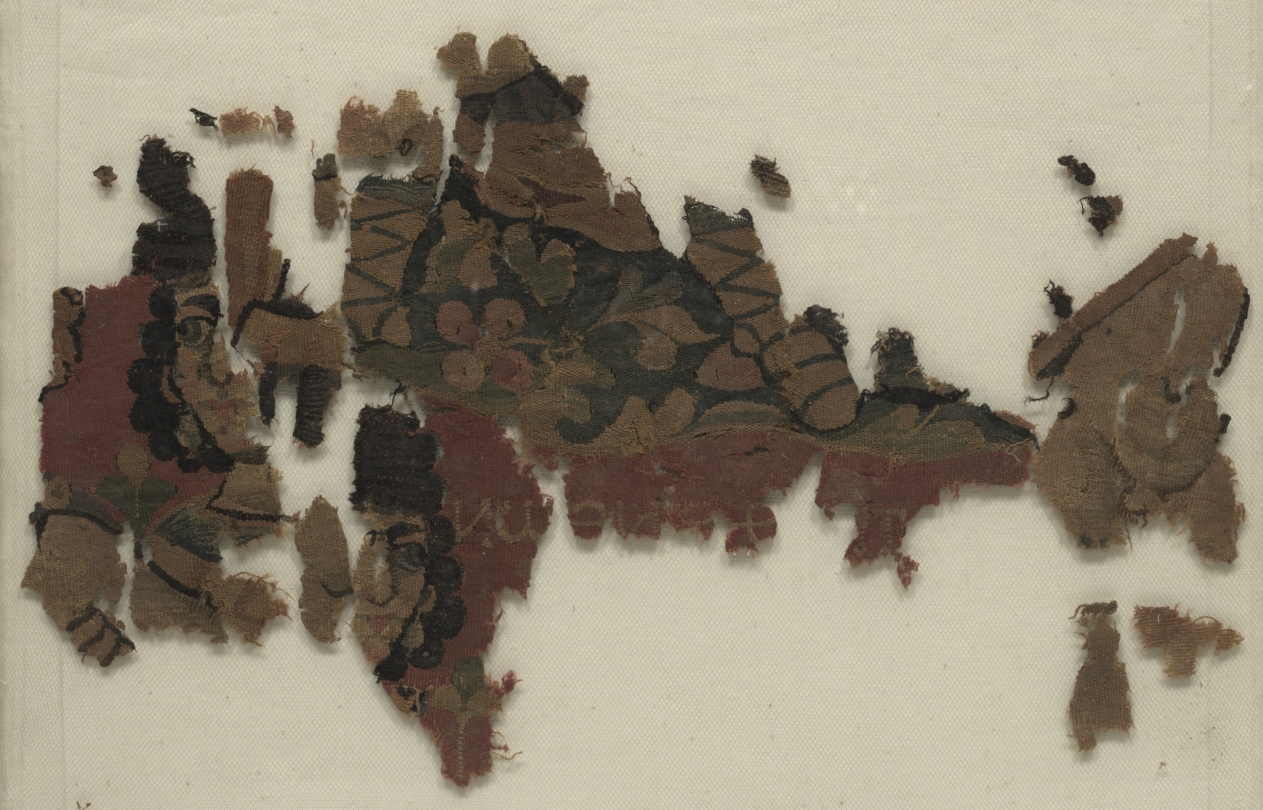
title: Four Fragments from a Hanging: Athena Partheneon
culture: Egypt, Byzantine period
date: 500s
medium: tapestry weave: wool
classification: Textile